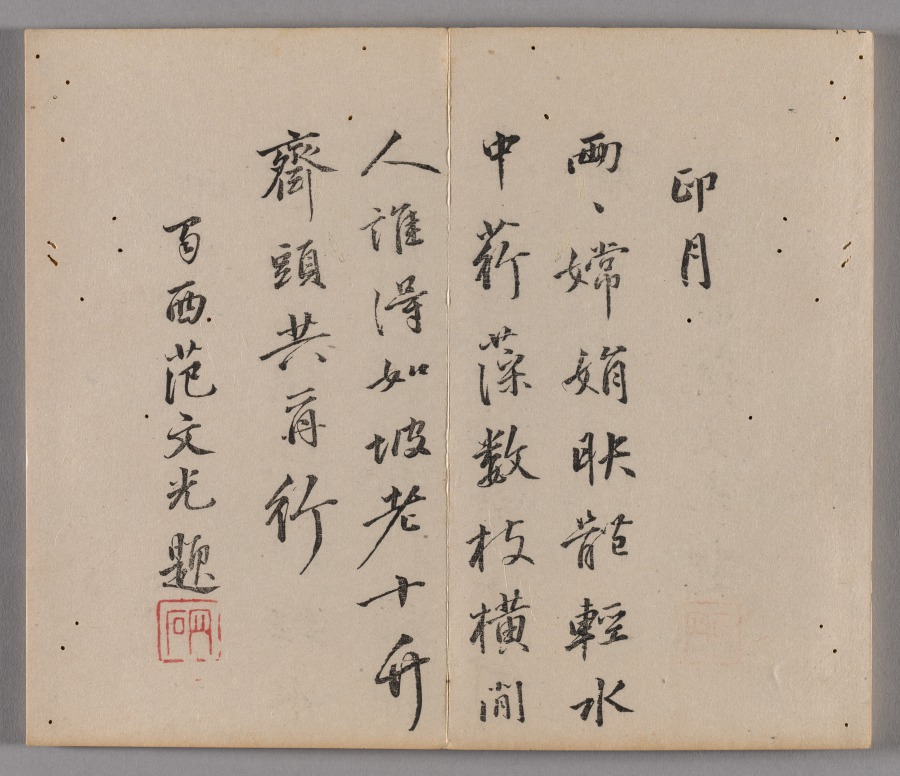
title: Ten Bamboo Studio Painting and Calligraphy Handbook (Shizhuzhai shuhua pu): Bamboo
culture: China, Qing dynasty (1644-1911)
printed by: Hu Zhengyan (Chinese, c. 1584–1674)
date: 1633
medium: Woodblock-printed book; ink and colors on paper; first edition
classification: Print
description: Color printing reached a level of perfection in the early 1600s, as seen in this Ten Bamboo Studio Collection of Calligraphy and Painting and the Mustard Seed Garden Manual of Painting (printed 1679 and 1701). The painterly quality, precision in registering (aligning) the woodblocks, and harmonious colors made them the most successful color print editions in Chinese history. Both editions were printed and compiled in Nanjing, spread nationwide, and had a great impact on the arts in Japan and Korea.